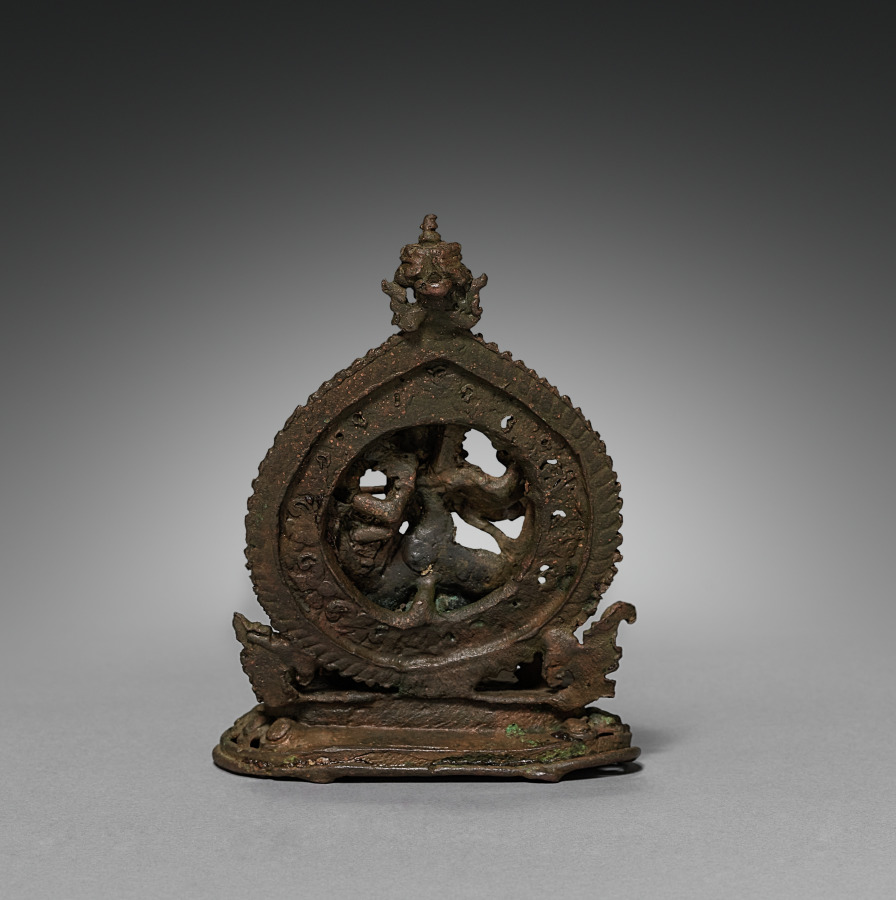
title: Durga Slaying the Demon Buffalo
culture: Nepal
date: 1500s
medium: bronze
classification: Sculpture